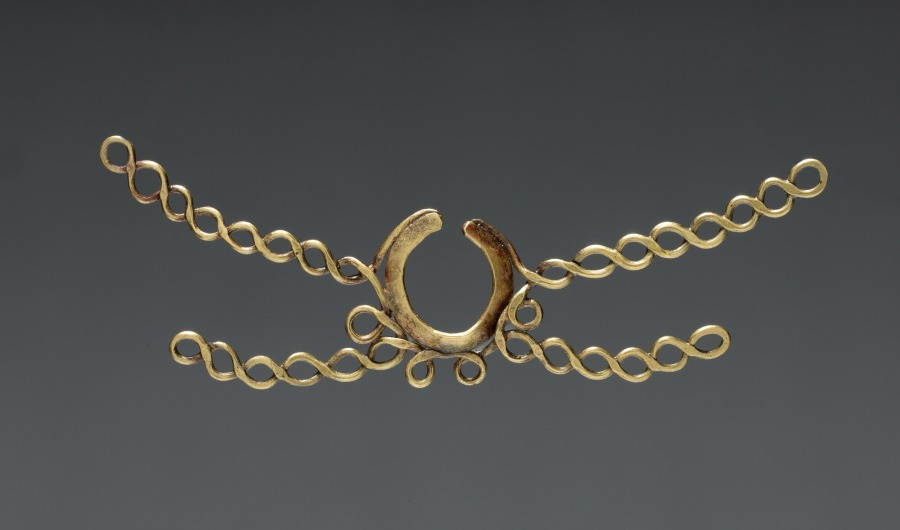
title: Nose Ornament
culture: Peru, Northern Highlands, Chavín de Huantar(?), Chavín style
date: c. 500–200 BCE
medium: hammered and cut gold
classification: Metalwork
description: There seems to be a link between Chavín religion and appearance of the Andes’ first large precious-metal objects, made using revolutionary new metallurgical processes. Chavín may have developed these technical innovations to express the inexpressible, the "wholly other" nature of its religion. In many areas, elite men and women wore the ornaments as emblems of their ties to this religion, and eventually were buried with them. These 16 objects, along with three others not in the museum’s collection, are said to have come as a group from Chavín itself.